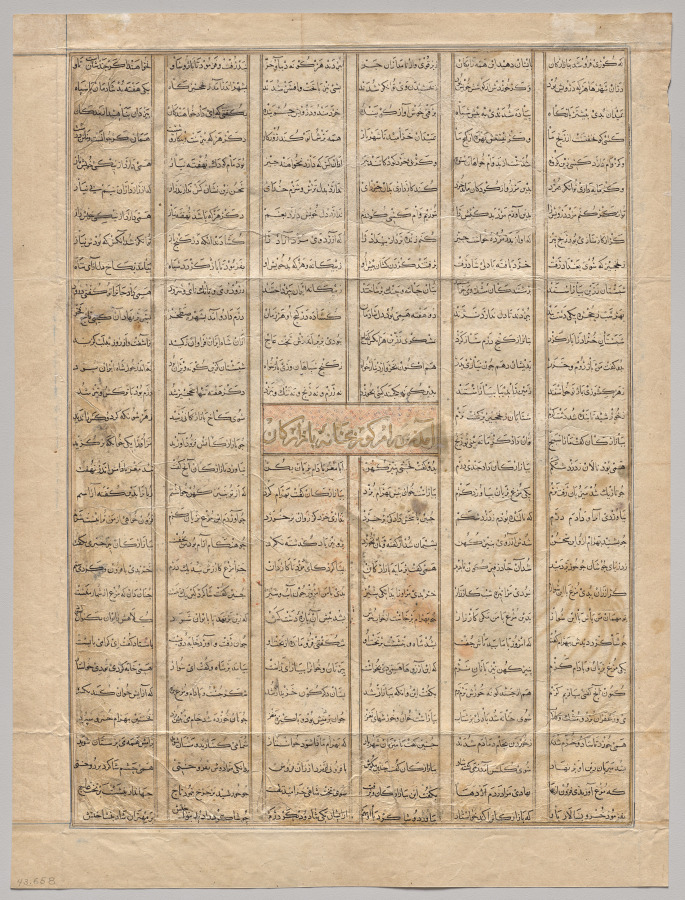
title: Bahram Gur Arrives at the House of a Merchant, text page (recto), from a Shahnama (Book of Kings) of Firdausi (940–1019 or 1025), known as the Great Mongol Shahnama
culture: Iran, Tabriz, Ilkhanid period (1256-1353)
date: 1330–35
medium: opaque watercolor, ink, and gold on paper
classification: Manuscript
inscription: Script: Naskh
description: In this intense painting, Bahram Gur plunges his sword into the breast of a dragon. A favorite character from Iran's pre-Islamic history, Bahram Gur (reigned 420–38 CE) was a popular ruler of the Sasanian dynasty and a great hunter. He took the name "Gur," meaning onager (a wild ass), because it was his preferred game, although he also excelled at killing dragons. As evidenced by this illustration's rock formations, tree trunk, and dragon, Iranian painting in the Mongol period borrowed numerous stylistic and spatial elements from Chinese models. With the surging landscape and writhing dragon rendered with equal energy, this is a picture of extraordinary unity and concentration.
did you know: The Shahnama, a poem written by Firdawsi around 1010, tells the history of ancient Iran.